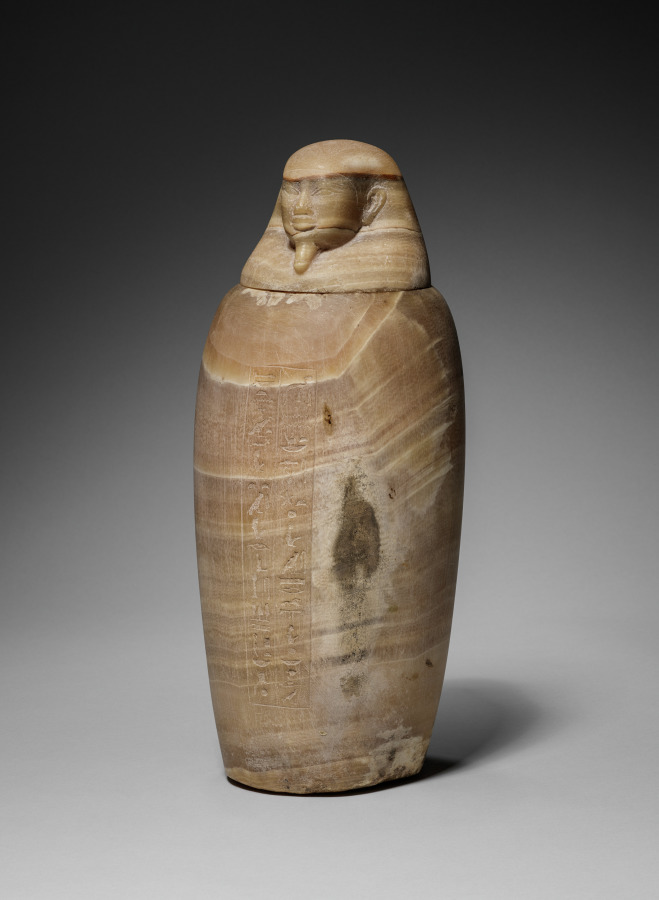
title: Canopic Jar with Man's Head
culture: Egypt, Late period (715–332 BCE), Dynasty 26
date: 664–525 BCE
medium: travertine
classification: Funerary Equipment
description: In the process of mummification, the liver, lungs, stomach, and intestines were removed, separately embalmed, and stored in specialized jars known as canopic jars (after a sailor in Greek mythology, who died at the town of Canopus in the Nile Delta and was worshipped there in the form of a human-headed jar). Each organ was identified with one of four funerary deities collectively known as the Sons of Horus: the liver with Imsety (man's head), the lungs with Hapy (baboon's head), the stomach with Duamutef (jackal's head), and the intestines with Qebehsenuef (falcon's head). It was their duty to protect the deceased and restore to him his body parts in the hereafter.